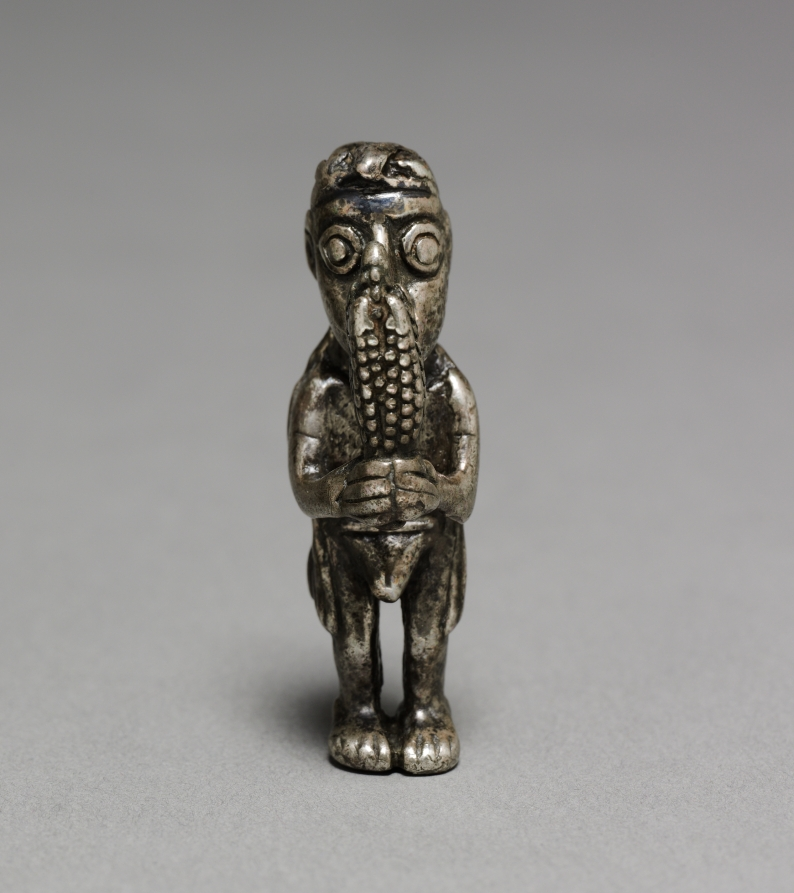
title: Agricultural Figurine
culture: Peru, Inka style (1400-1532)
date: 1400–1532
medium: cast silver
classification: Sculpture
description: Precious metal was a major Inka artistic medium, but most was melted down after the conquest to fund the Spanish court. The sole remains are small-scale objects from tombs and offerings. The body of the figurine is covered with fruits and vegetables and may have been made after the Spanish conquest.